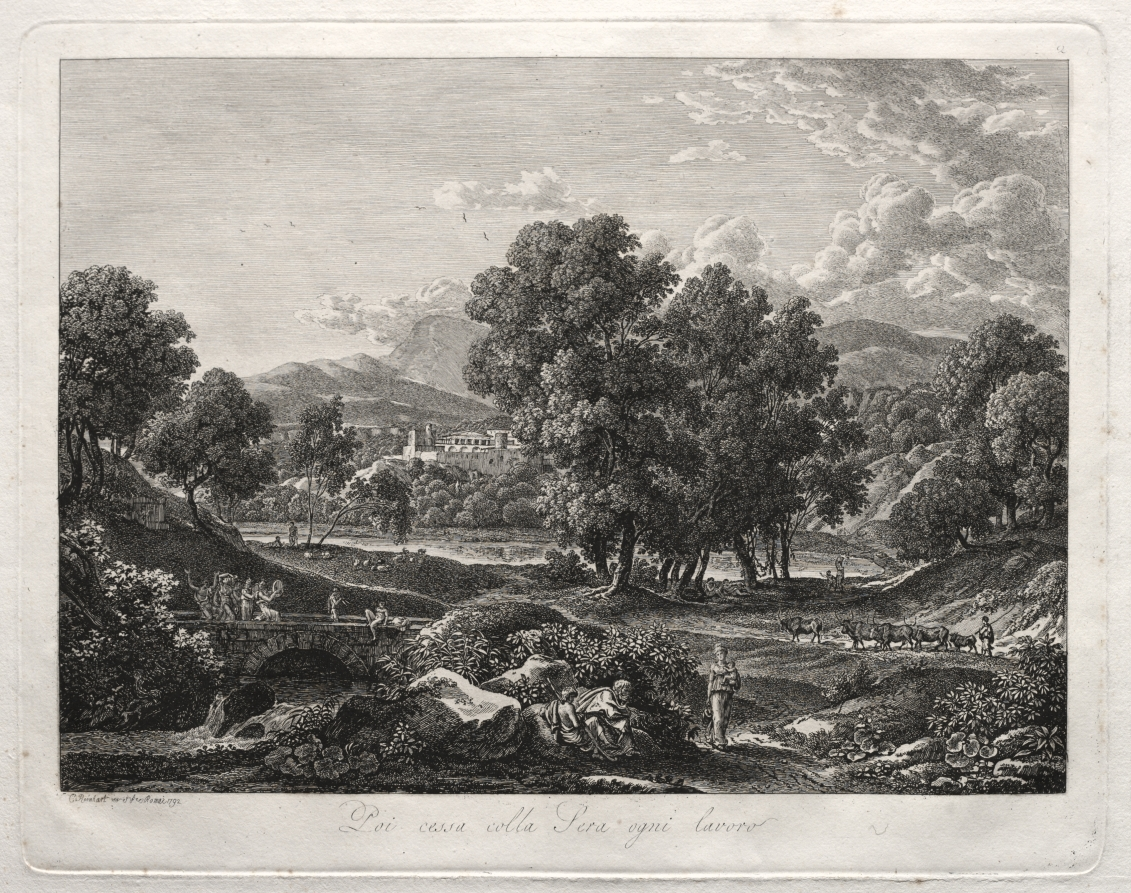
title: Heroic Landscape: The Shepherd's Dance on the Bridge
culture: Germany, 19th century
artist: Johann Christian Reinhart (German, 1761–1847)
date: 1792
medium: etching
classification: Print